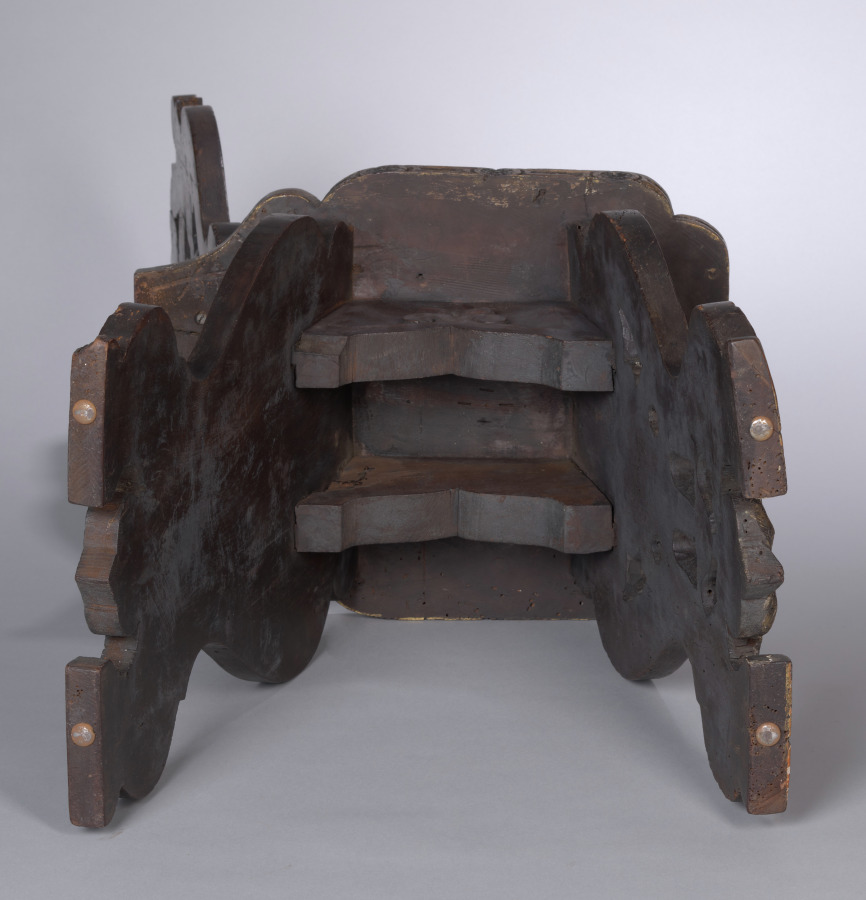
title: Chair, Sgabello type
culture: Italy, late 16th century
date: late 1500s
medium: walnut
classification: Furniture and woodwork